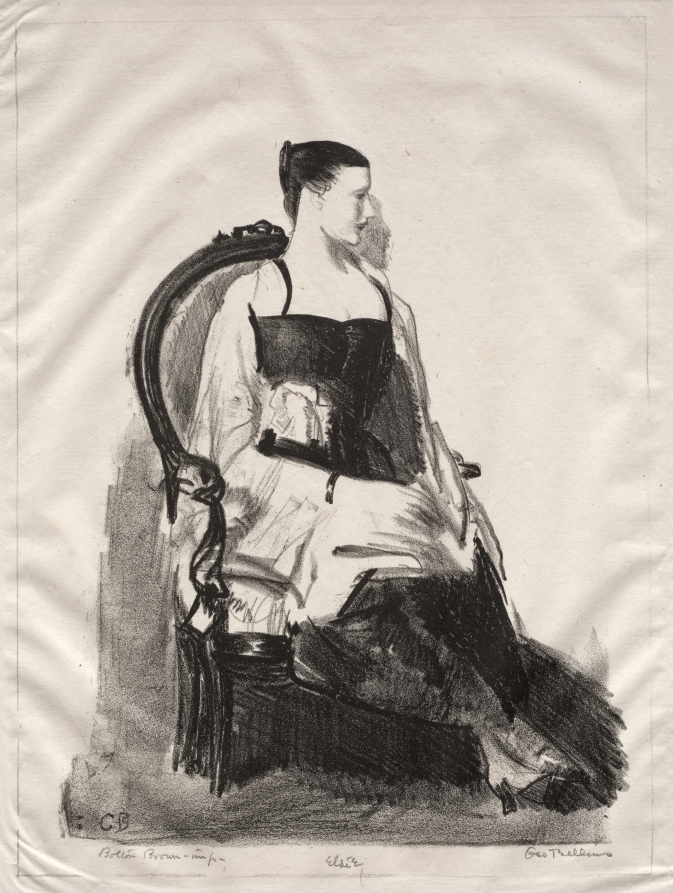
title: Elsie, Figure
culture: America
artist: George Bellows (American, 1882–1925)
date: 1921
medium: lithograph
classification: Print